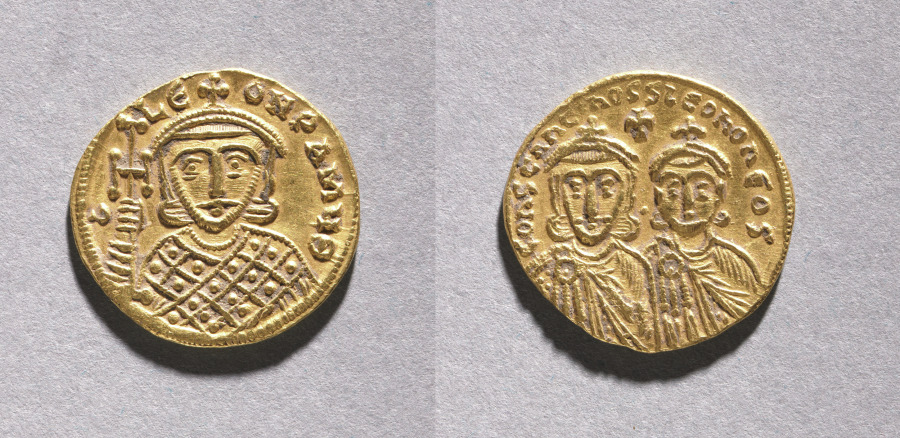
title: Solidus with Leo IV the Khazar and His Father Constantine V Copronymus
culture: Byzantium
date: c. 751–775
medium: gold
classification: Coins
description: The vast number of surviving Byzantine coins attests to the level of trade across the empire. Controlled and supervised by the emperor, the producers of coins took care to represent his authority and reflect his stature. Talented artists were recruited to engrave the dies (molds) used for the striking of coins. Emperors increasingly came to include their heirs and co-emperors on their coinage, as well as other family members or even earlier rulers. Coins were recognized, then as now, as small, portable works of art. With their inscriptions and images, Byzantine coins provide valuable documentation of historical events and a record of the physical appearance of the emperors. The coins shown here include the solidus, the basic gold coin of 24 karats; the tremissis, a gold coin of one-third the weight and value of the solidus; and the nomisma, which in the 10th century replaced the solidus as the standard gold coin.